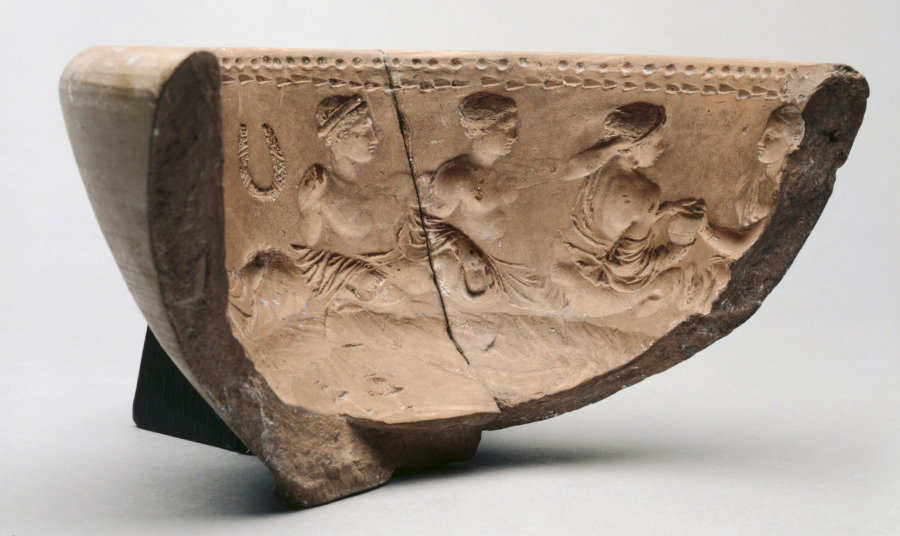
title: Fragment of a Mold for Arretine Bowl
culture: Italy, Roman, Augustan period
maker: M. Perennius (Roman, c. 100 BCE–100 CE)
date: 27 BCE–14 CE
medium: terracotta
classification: Ceramic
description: Preserving nearly half of a mold for a relief-decorated terracotta bowl, these joining fragments show women and youths reclining at a symposium. On one side, a woman passes a bowl or cup to a youth, whom another youth reaches over to crown with a garland or wreath. A third youth reclines beside them, and a second woman sits on the next couch, looking away and holding a lyre on her raised knee. Above, within a stamped rectangle, appears the signature M. PERENN | TIGAANI.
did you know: This mold includes an artist signature, reversed to appear properly in the final product.